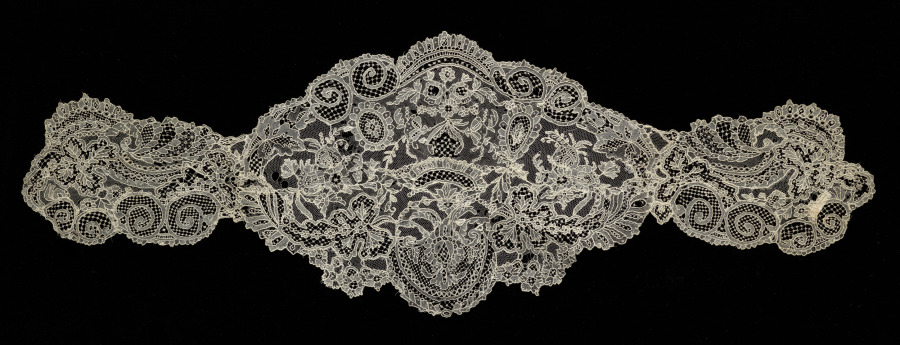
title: Lace Cap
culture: Belgium, Brussels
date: c. 1840–60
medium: Needle lace (point de gaze)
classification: Lace